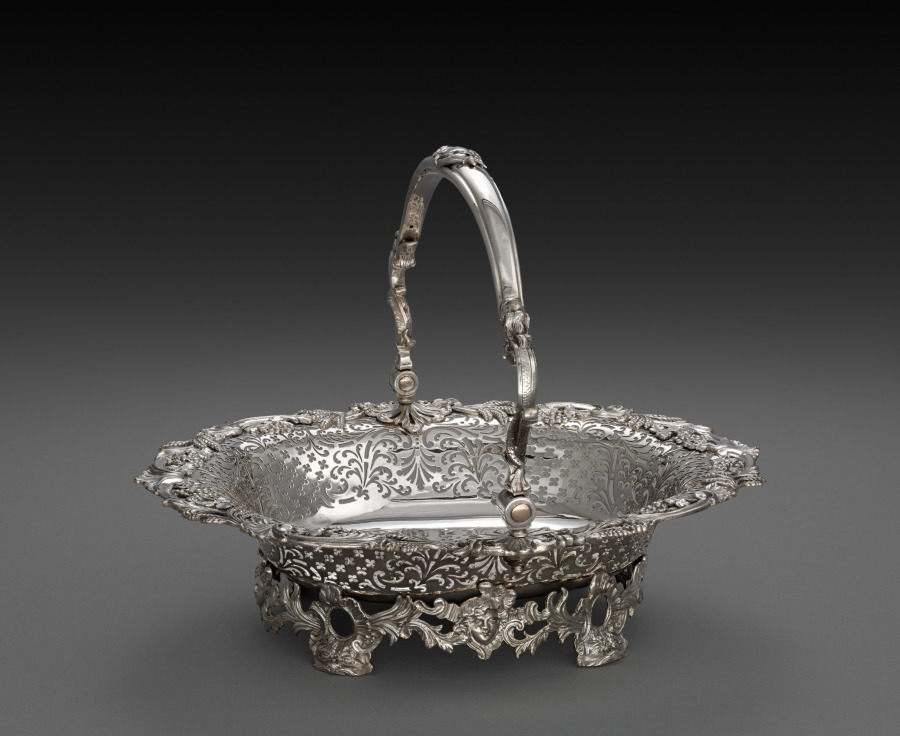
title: Cake Basket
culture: Britain, London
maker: Samuel Herbert and Company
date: 1753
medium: Silver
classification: Silver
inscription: “H/I I”; hallmark for London, George II, Samuel Herbert and Henry Bailey, and date 1753.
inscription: “To/H.H.M./from/S.K., E.W.G., J.H.J., D.R.L., M.B.R./on the occasion of his/Silver Wedding/1911-1936”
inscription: “50-2”; hallmark for London, George II, Samuel Herbert and Henry Bailey, and date 1753.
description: Drinking tea at the end of the day, accompanied by sweet cakes and savory delights, became an established ritual in Britain at all levels of society during the 1700s. In grand houses, silver teapots, caddies, and cake baskets elevated this afternoon refreshment to a formal gathering.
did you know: Sheaves of wheat adorning the rim of this basket allude to the flour used in pastries and cakes for tea.